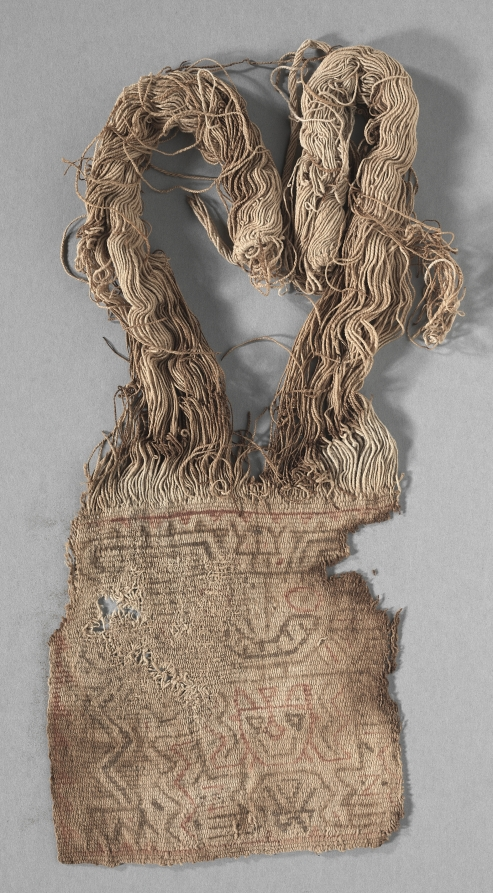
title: Mummy Bundle "Mask"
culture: Peru, South Coast, Ica Valley, Ocucaje site, Paracas style (700 BCE–1 CE)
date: 170 BCE–70 CE (radiocarbon date, 95% probability)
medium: plain warp-faced cloth, painted: cotton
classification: Textile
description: The Paracas people of Peru's South Coast buried their dead in pear-shaped mummy bundles made of a seated human body carefully wrapped in garments and other textiles. Sometimes a painted cloth was placed at the top of the bundle, as though it served as the bundle's face, head, or "mask." The cloth was padded on the back so it curved outward like a face, and the tress-like yarns (unwoven warps) at the upper edge were arranged around a solid cotton disk that, in turn, was wrapped with a headband. Some cloths were painted with mask-like faces, and others with full figures, apparently mythical creatures.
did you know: These masks fall into two categories, those with only a face and those with a full-bodied figure.